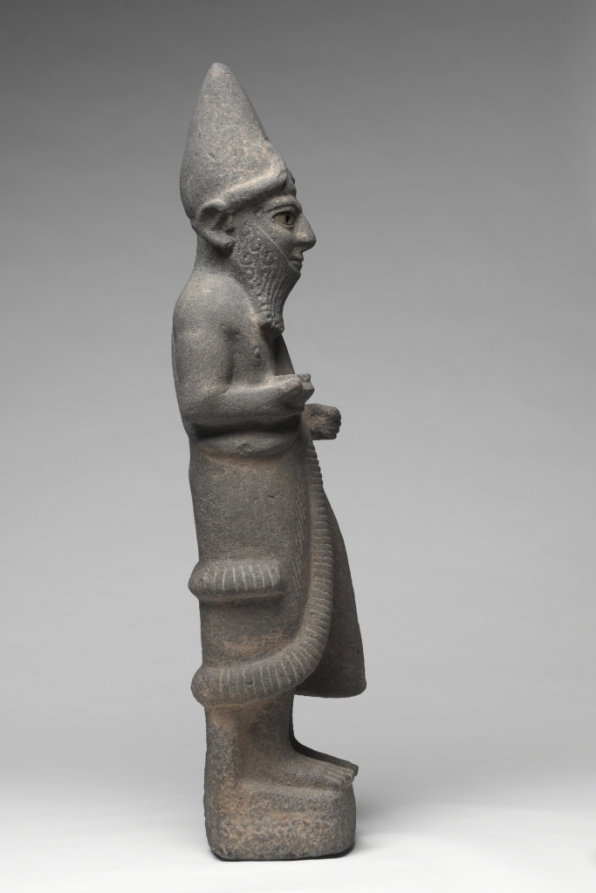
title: Priest-King or Deity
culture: Hittite, North Syria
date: c. 1600 BCE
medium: basalt with bone eyes (left, ancient; right, restored)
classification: Sculpture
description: The Hittites migrated into Anatolia in the 3rd millennium BCE and spoke an Indo-European language, a group that includes Greek, Latin, Persian, Sanskrit, English, and most modern European languages. They were the first ancient people to use iron for weapons. From about 1600–1200 BCE their empire was at its peak, extending from central Anatolia to Syria, and south along the eastern Mediterranean. Their vast empire and interest in commerce enabled the Hittites to spread Mesopotamian ideas and culture throughout the ancient Mediterranean world. This large basalt sculpture is exceptionally rare in depicting a Hittite god or priest-king wearing a horned conical crown, false beard, and long robe. He holds a bowl in his right hand and once held something in his left, perhaps a staff or sword.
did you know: The left eye of the sculpture is the original bone inlay while the right eye is a modern restoration done after the piece was damaged.